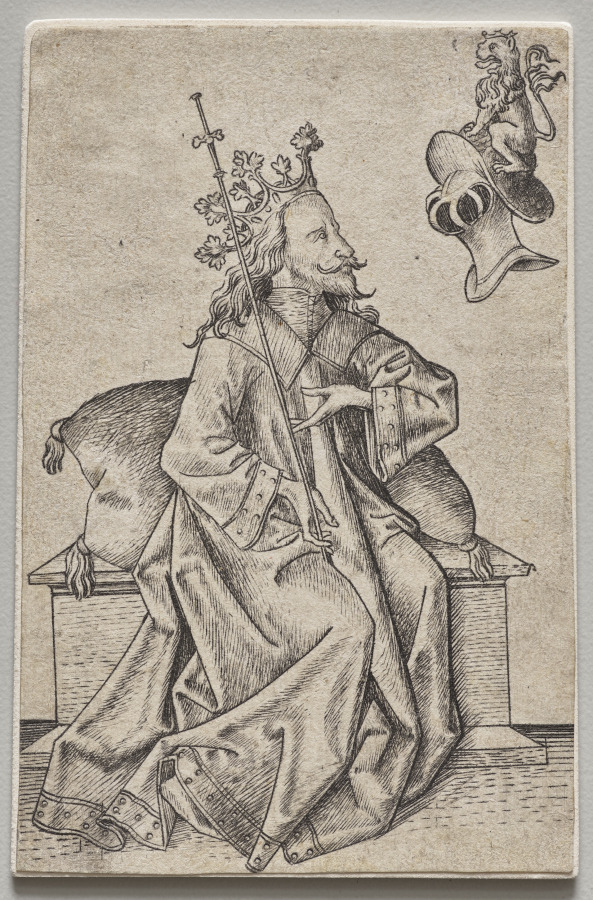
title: The Small Playing Cards: Second Suit: Helmets: Playing Card with King and Helmet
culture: Germany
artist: Master ES (German, active 1450–67)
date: 1450–67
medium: engraving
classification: Print